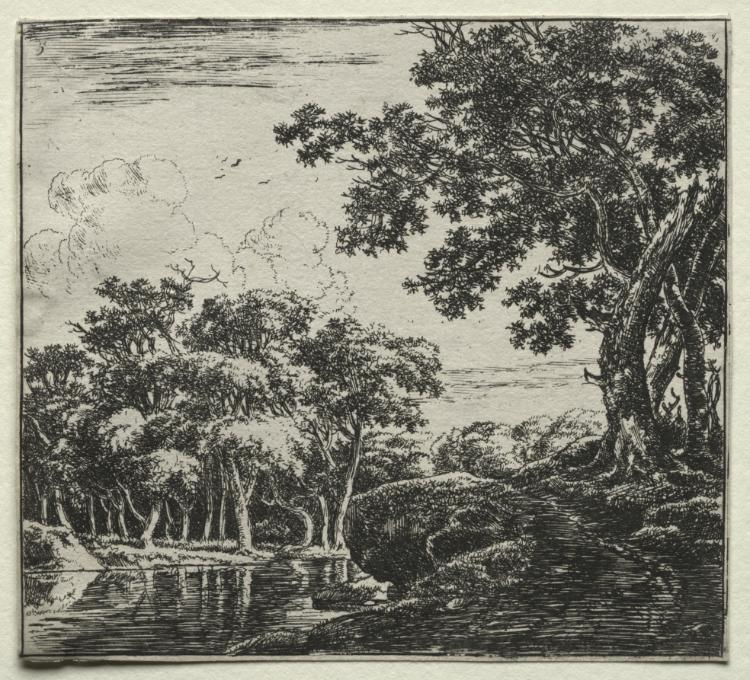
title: The Three Large Trees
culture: Flanders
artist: Herman Naiwincx (Flemish, c. 1624–after 1651)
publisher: Clement de Jonghe (Dutch, 1579–1679)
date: 1640–51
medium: etching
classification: Print